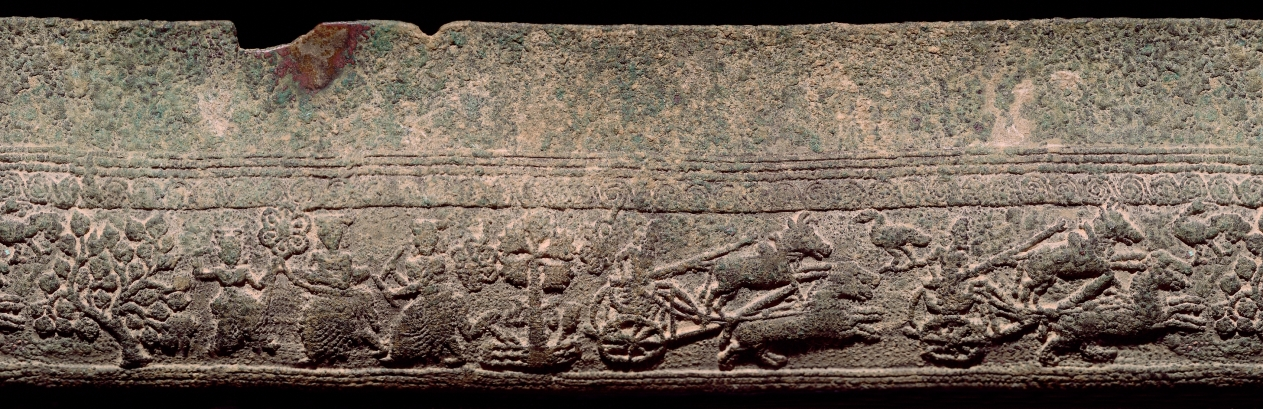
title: Libation Cup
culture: India, Maurya period (322–185 BCE)–Shunga period (185–78 BCE)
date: c. 235–185 BCE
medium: bronze, lost wax technique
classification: Metalwork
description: The remarkably clear, tiny carvings in an uninterrupted frieze around the lower section include one sacred palm tree and one fig tree (ficus religiosa) that divide the space into two main scenes. One features female musicians, the other has two chariots, each drawn by a pair of galloping horses. Bulls, birds, and flowers fill the background spaces. This cup is from a group found in an area with close links to Indo-Greek kingdoms, and the chariots and framing motifs reveal knowledge of Hellenistic art.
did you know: The tree carved into the cup is of the same species as the Bodhi tree, under which the Buddha reached enlightenment.